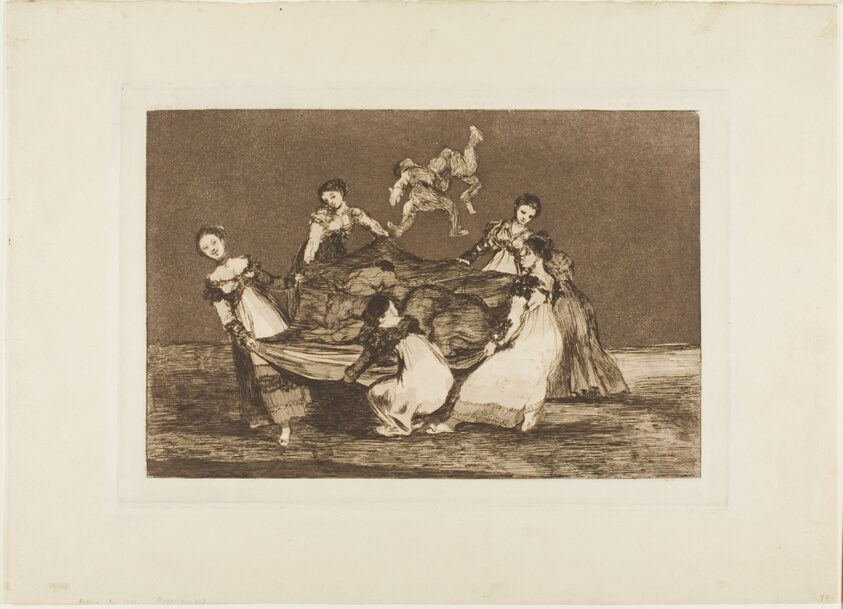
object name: Print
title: Heavier than a Dead Donkey, plate 1 from Los Proverbios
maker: Francisco José de Goya y Lucientes (Spanish, 1746-1828); published by the Royal Academy of Fine Arts of San Fernando (Spanish, founded 1744)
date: 1815–17, published 1864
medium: Etching and aquatint, with scratches, in brown on ivory wove paper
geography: Spain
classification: etching; print; prints and drawing